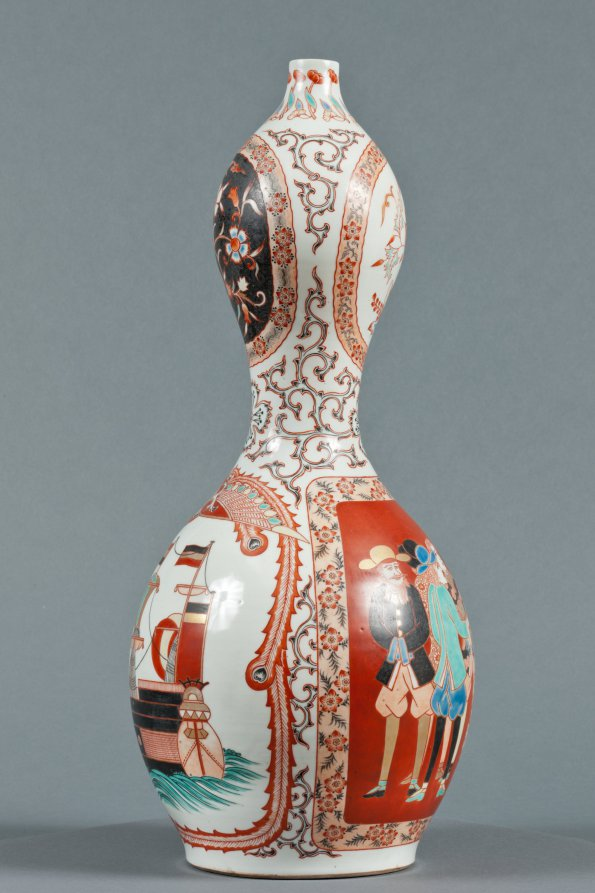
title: Bottle with Western Ships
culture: Japan, Edo period (1615–1868)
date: c. 1800–1868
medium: Porcelain with decoration in colored enamels and underglaze blue, overglaze enamels, and gold (Hizen ware, Arita type)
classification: Ceramic